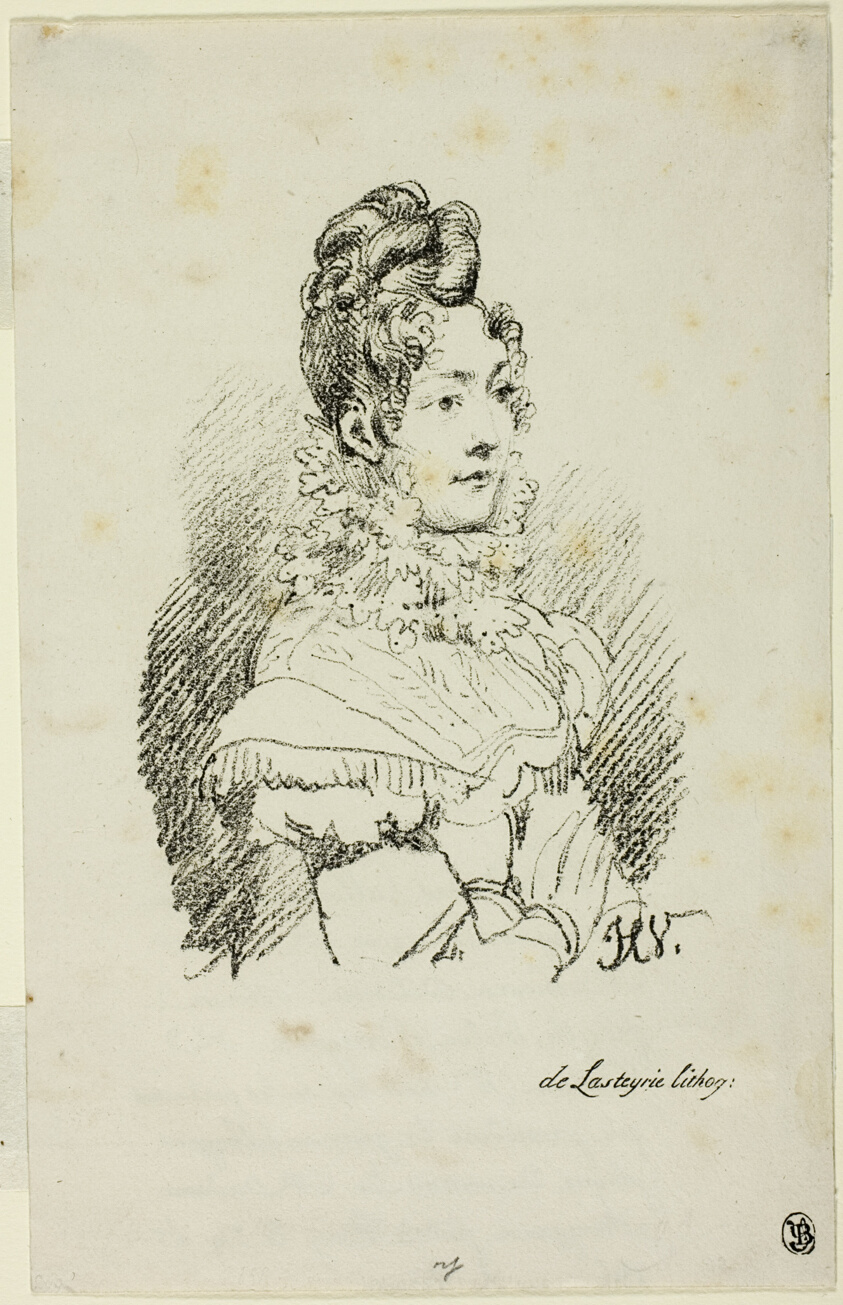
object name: Print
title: Portrait of Madame Perregaux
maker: Horace Vernet (French, 1789-1863); printed by Comte Charles Philibert de Lasteyrie (French, 1759-1849)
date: 1816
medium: Lithograph in black on cream wove paper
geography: France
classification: lithograph; print; prints and drawing